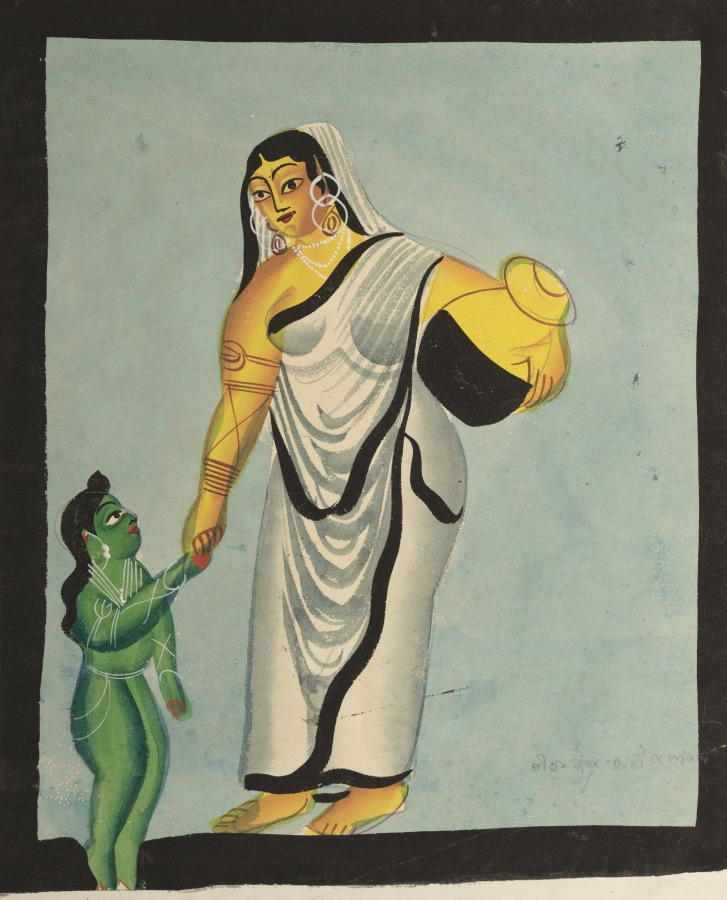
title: Yasoda Taking the Infant Krishna for a Walk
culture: Eastern India, Bengal, Kolkata, Kalighat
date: c. 1890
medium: Gum tempera, graphite, ink, and tin on paper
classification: Painting